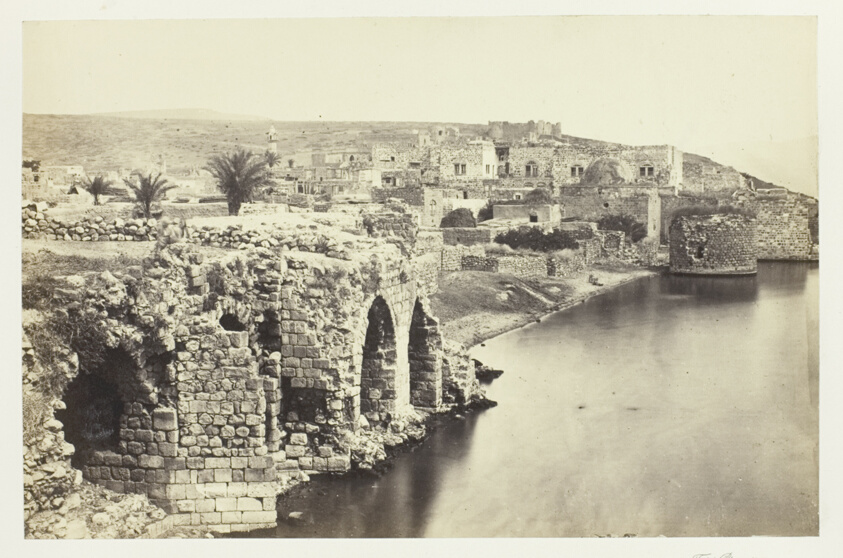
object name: Photograph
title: The Town and Lake of Tiberius, from the South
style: 19th century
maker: Francis Frith (English, 1822–1898)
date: 1857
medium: Albumen print, pl. 12 from the album "Egypt and Palestine, Volume II" (1858/60)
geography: England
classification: albumen silver print; photographic process; photography; photograph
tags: Collected by Hugh Edwards, Egypt and Palestine